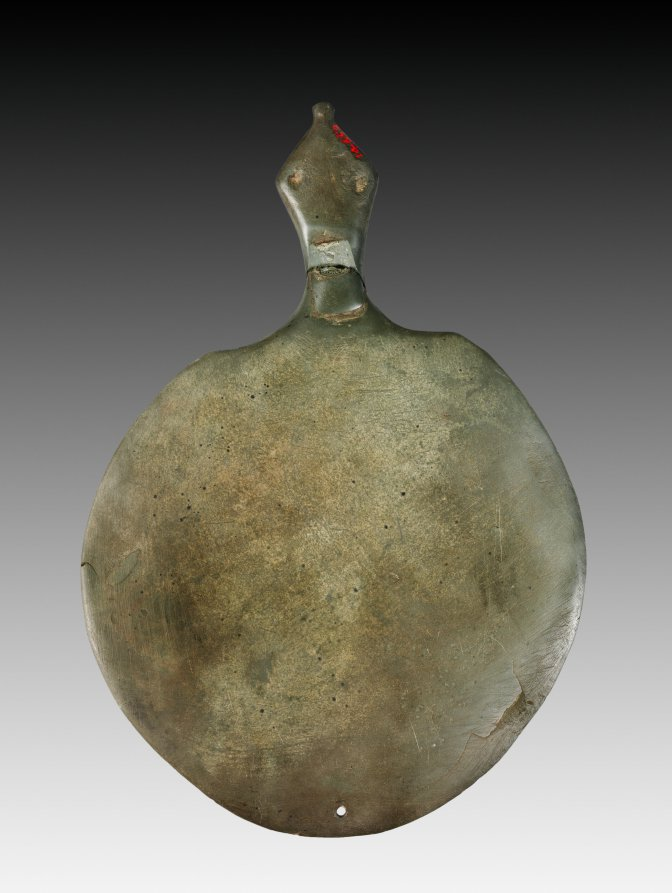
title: Palette in the Form of a Turtle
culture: Egypt, Modern forgery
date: Forgery of the early 20th Century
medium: slate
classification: Implements